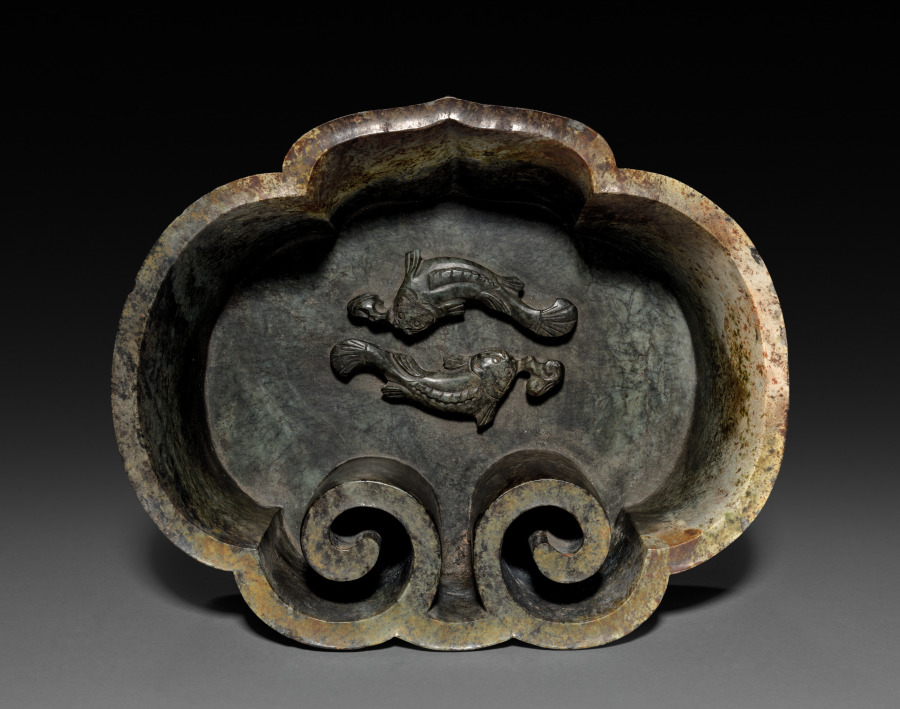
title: Fish Bowl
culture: China, Song dynasty (960-1279) or later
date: 960–1279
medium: jade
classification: Jade